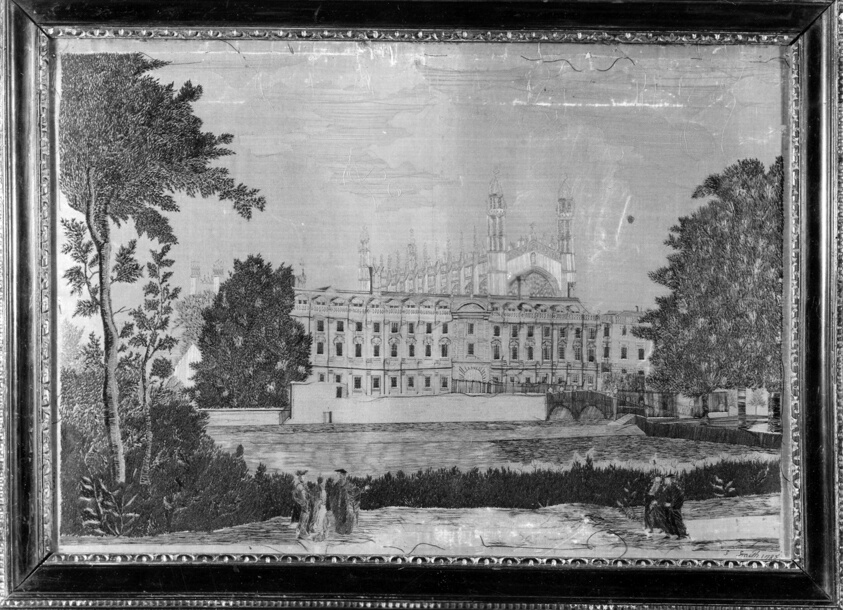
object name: Textile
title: Picture of Kings College Chapel, Cambridge (Needlework)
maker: S. Smith (English, active c. 1785); England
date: 1785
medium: Silk, satin weave; embroidered with silk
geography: England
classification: textile; needlework (visual works)